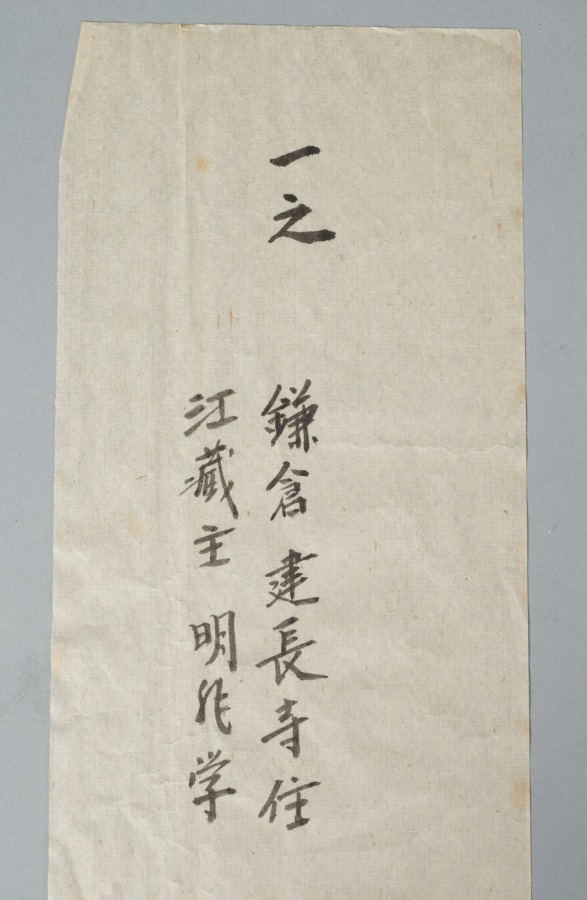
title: Emperor Minghuang Teaching Yang Gueifei to Play the Flute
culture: Japan, Muromachi period (1392–1573)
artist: Choryusai (Japanese)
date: late 1400s–early 1500s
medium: hanging scroll; ink and color on paper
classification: Painting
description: Minghuang, a prominent emperor of Tang (618-906) China and his consort, Yang Gueifei, have inspired many legends, paintings, and poetry in later Chinese culture. Through the study of Chinese literature and the collecting of Chinese paintings, tales of their lives and romance became well-known in Muromachi Japan.